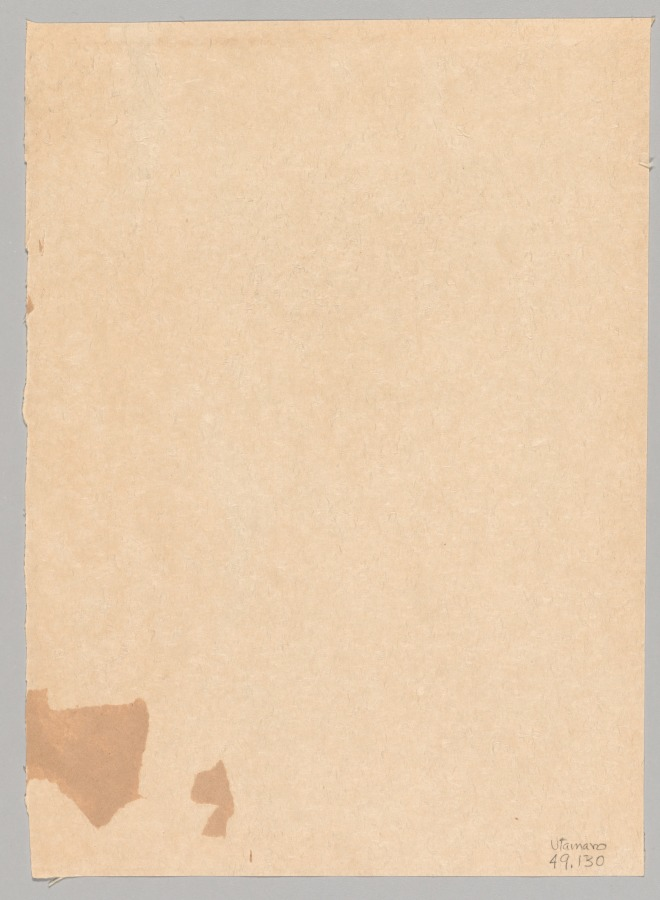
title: No Title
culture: Japan, Edo period (1615–1868)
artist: Kitagawa Utamaro (Japanese, c. 1754–1806)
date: 1753–1806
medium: color woodblock print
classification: Print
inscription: Signature: Utamaro, gwa